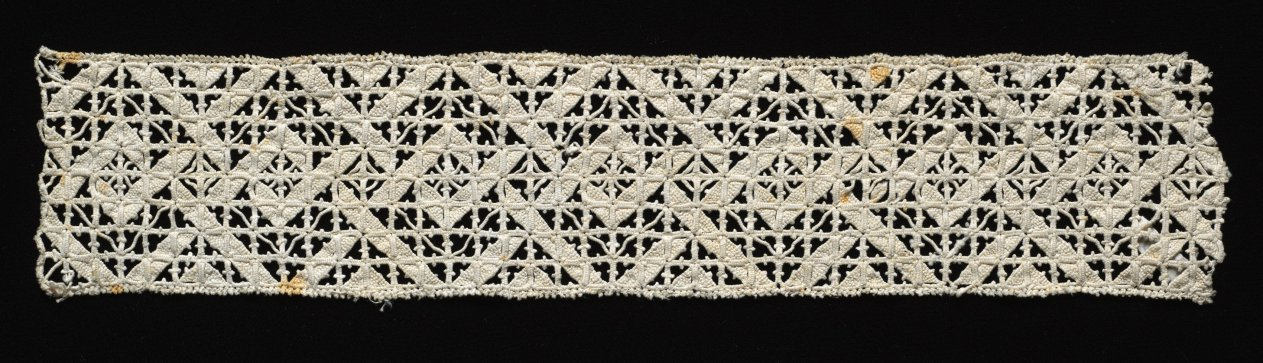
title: Lace Fragment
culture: Italy, Venice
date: 1500s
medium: Linen: needle lace, reticella insertion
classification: Lace